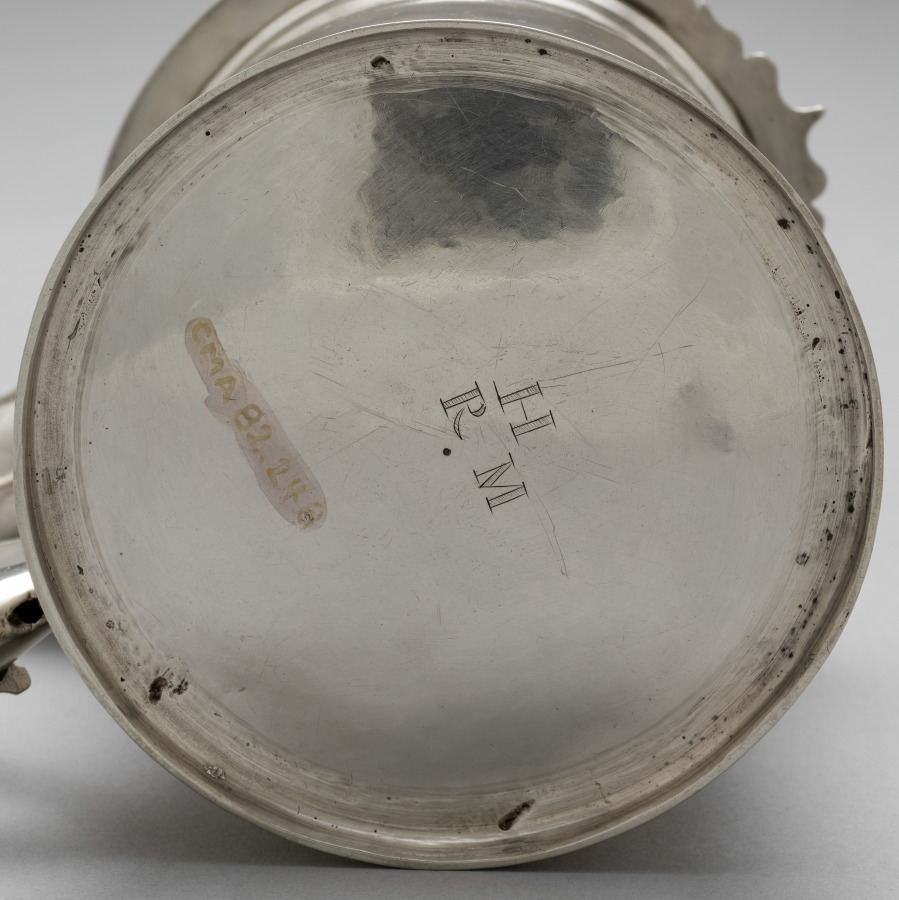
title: Tankard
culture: England, London, 18th century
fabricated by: Anthony Nelme (British)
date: 1703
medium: silver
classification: Silver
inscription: engraved beneath base: "H/RM." Engraved opposite handle crest with head of a blackamore; identified in Fairbairn as DEN family crest.